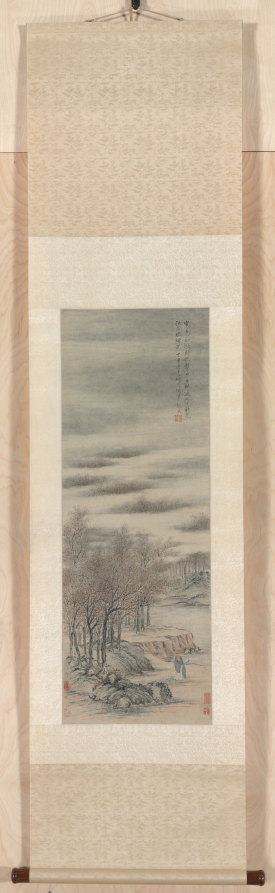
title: Listening to the Sound of Autumn in a Misty Grove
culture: China, Qing dynasty (1644-1911)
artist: Zhang Feng (Chinese, active c. 1632–1662)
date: 1657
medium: Hanging scroll; ink and color on paper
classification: Painting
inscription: Artist's inscription, signature, and 2 seals: Frosty colors have just appeared throughout the countryside,/ Autumn sounds echo unexpectedly through the trees./ The distant mountains cannot be seen,/ As the evening mist spreads, thicker and deeper./ Casually painted at the bamboo window on the solstice day of the dingyou year [1657]. Zhang Feng. [seal] Feng. [seal, lower left corner] Shangyuan Laoren. (Translation by LYSL/HK/WKH)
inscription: 3 additional seals: 1 of Fa Liang (Qing Dynasty); 2 unidentified.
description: Zhang Feng from Nanjing passed the local government examinations shortly before the fall of the Ming dynasty. With the Manchu conquest, he joined the ranks of loyalists who refused to serve the new regime. He chose the intermittently frugal life of a Buddhist adept. Many of his paintings lament the loss of the empire. In this scroll, he depicts a lone figure in a stark landscape of frosty atmosphere enshrouded in mists. Close looking reveals red strokes that color the grounds, a way of expressing his loyalty to the Ming whose family name Zhu means red.